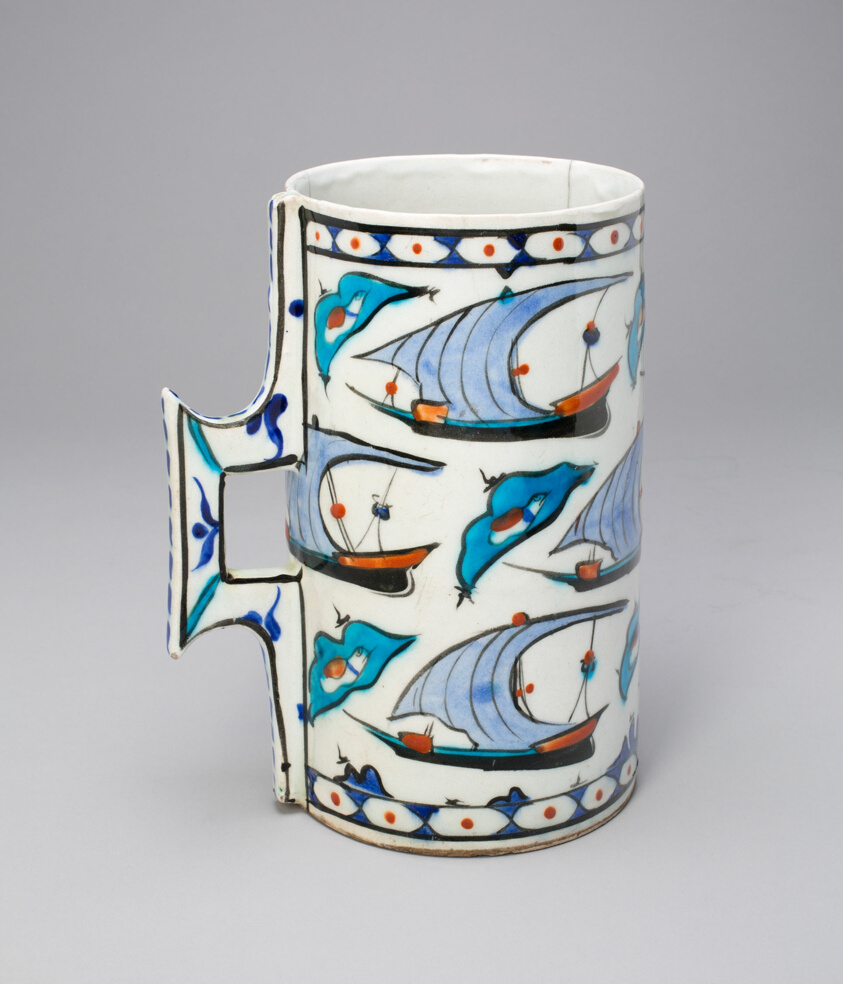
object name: Architectural fragment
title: Tankard (Hanap) with Ships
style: Islamic (culture or style)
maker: Turkey; Iznik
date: Ottoman dynasty (1299–1923), late 16th century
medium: Iznik ware, fritware with underglaze painting in blue, lavender, red, and black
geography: Turkey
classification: drinking vessel; asian art; ceramics; vessel